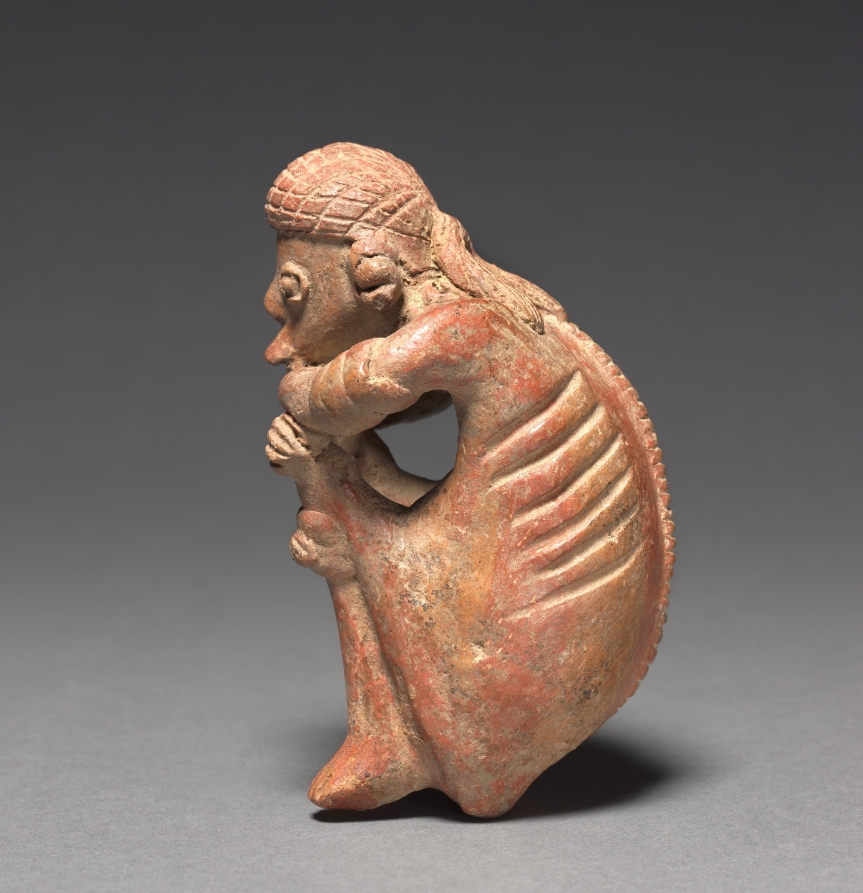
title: Emaciated Crouching Figure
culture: Mexico, Nayarit, San Sebastian Red Style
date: c. 100 BCE–300 CE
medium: earthenware with burnished red slip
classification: Sculpture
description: The protruding ribs and staring eyes of this melancholy figure may show the effects of a ritual fast, rather than famine. Fasting purified an individual in preparation for religious rites and may have enhanced the search for supernatural visions.